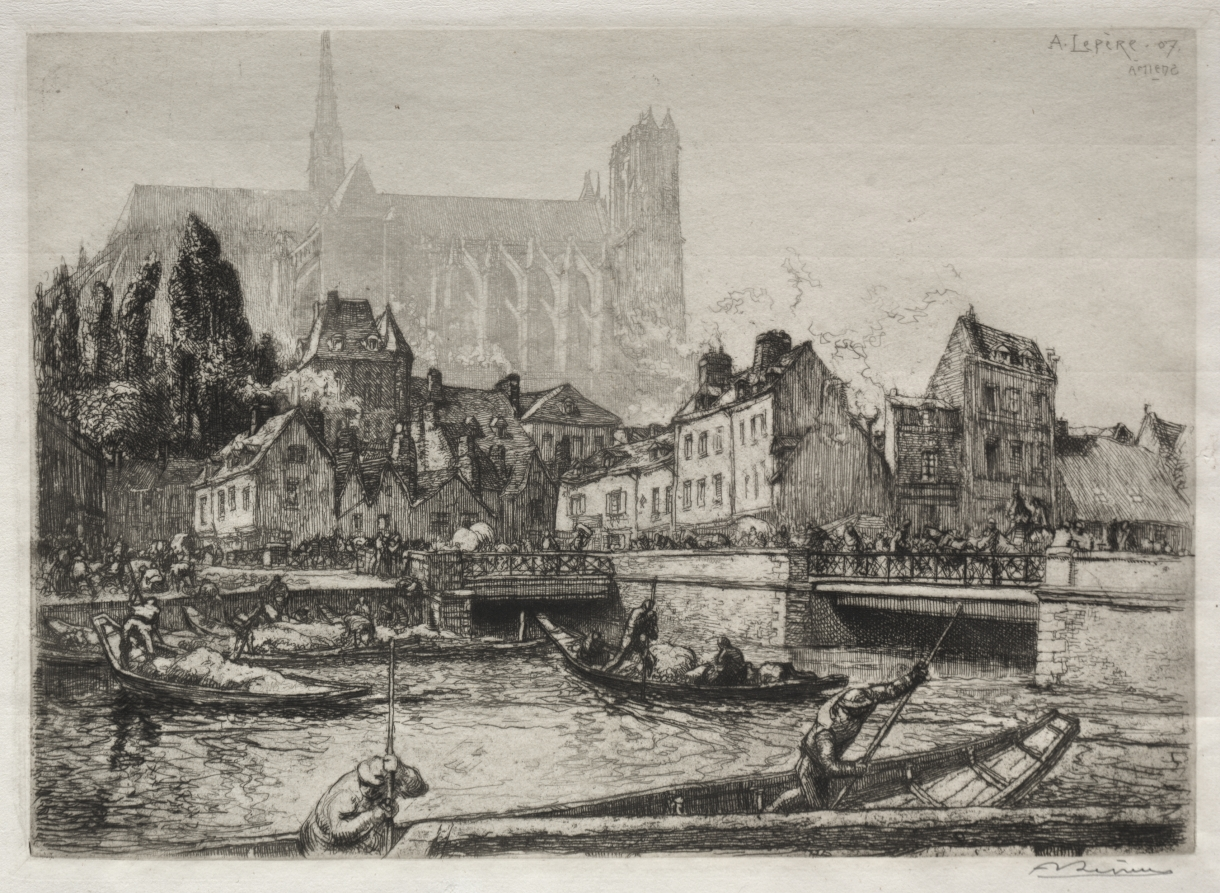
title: Arrivées des Légumes-Amiens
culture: France, 20th century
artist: Auguste Louis Lepère (French, 1849–1918)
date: 1907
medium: etching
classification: Print